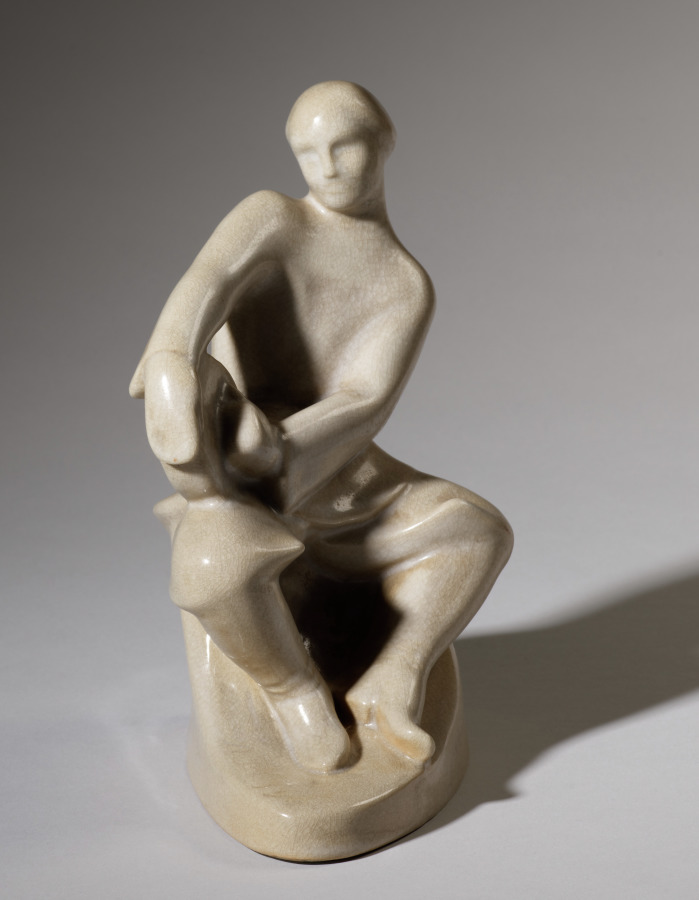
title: Tambourine Player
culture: America, Ohio, Cleveland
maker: Cowan Pottery Studio (America, Rocky River, Ohio, 1920–1931)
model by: Alexander Blazys (American, born Russian Empire [now Lithuania], 1894–1963)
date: 1927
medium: mold-made ceramic, glazed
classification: Ceramic